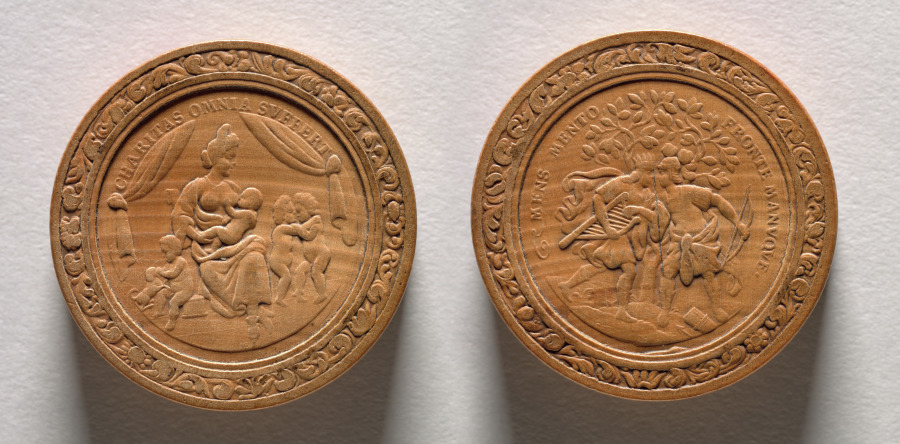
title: Gaming Piece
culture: Germany, late 17th-early 18th Century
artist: Martin Brunner (German, 1659–1725)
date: c.1700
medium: wood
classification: Furniture and woodwork